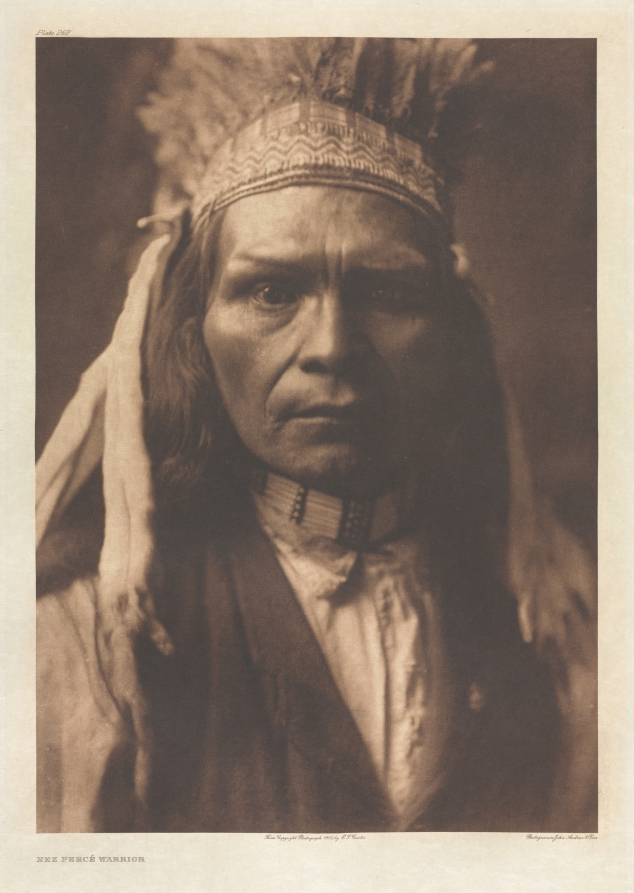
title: Portfolio VIII, Plate 262: Nez Percé Warrior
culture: America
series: The North American Indian: being a series of Portfolios picturing and describing the Indians of the United States, the Dominion of Canada, and Alaska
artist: Edward S. Curtis (American, 1868–1952)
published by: The University Press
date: 1905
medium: photogravure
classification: Portfolio